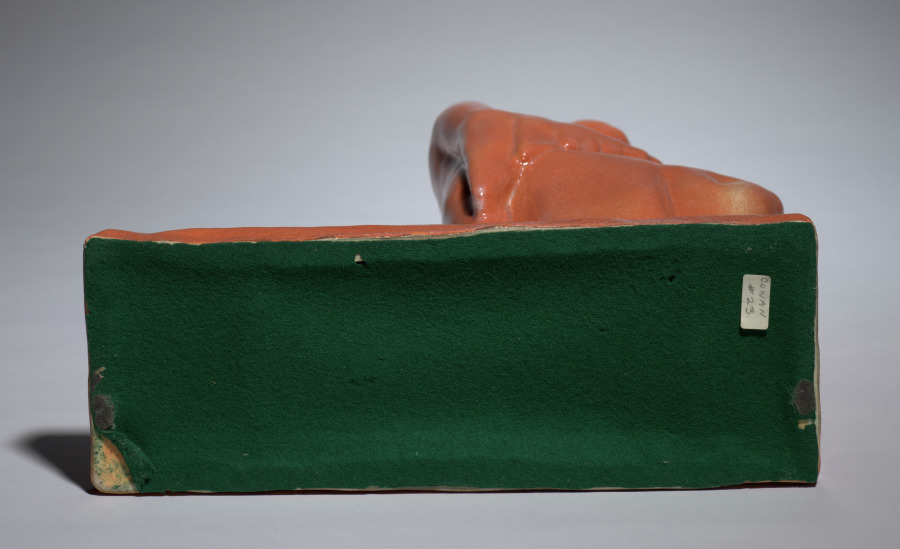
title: Madonna and Child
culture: America, Ohio, Cleveland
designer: R. Guy Cowan (American, 1884–1957)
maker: Cowan Pottery Studio (America, Ohio, Lakewood, 1913–1919)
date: c. 1928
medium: pottery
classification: Ceramic